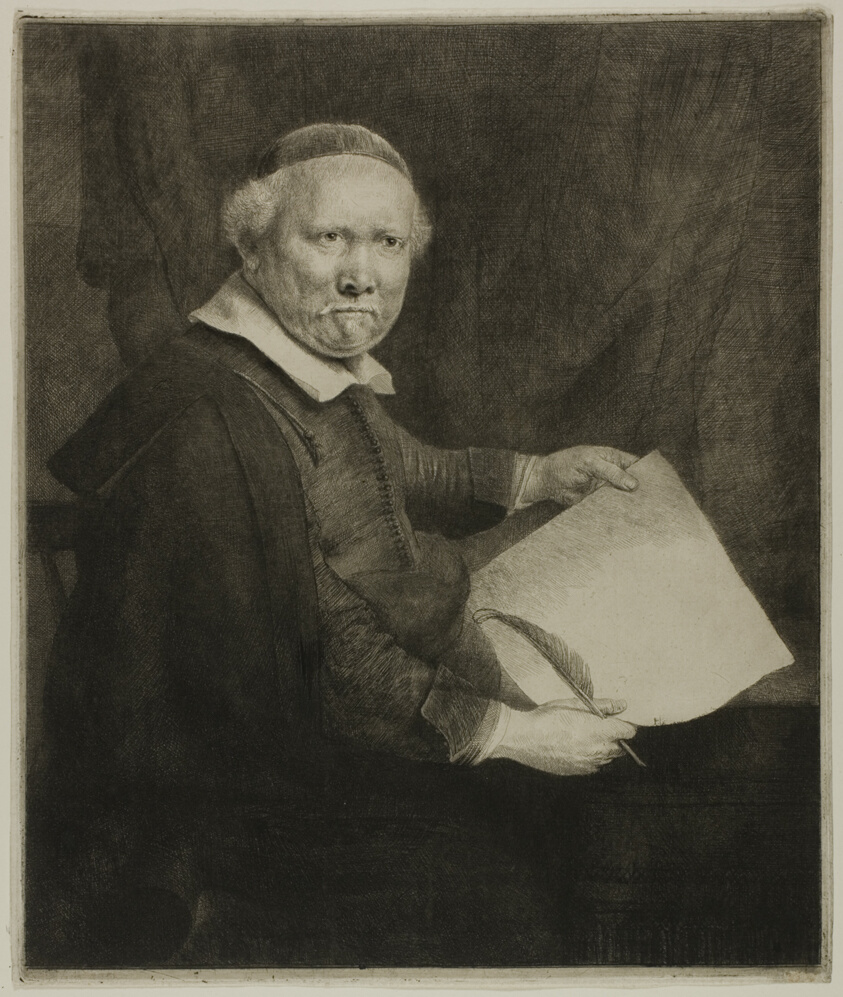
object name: Print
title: Lieven Willemsz. von Coppenol, Writing Master: The Larger Plate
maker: Rembrandt van Rijn (Dutch, 1606-1669)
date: c. 1658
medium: Etching, drypoint and burin on ivory paper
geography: Holland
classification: etching; print; prints and drawing; paper; drypoint; burin